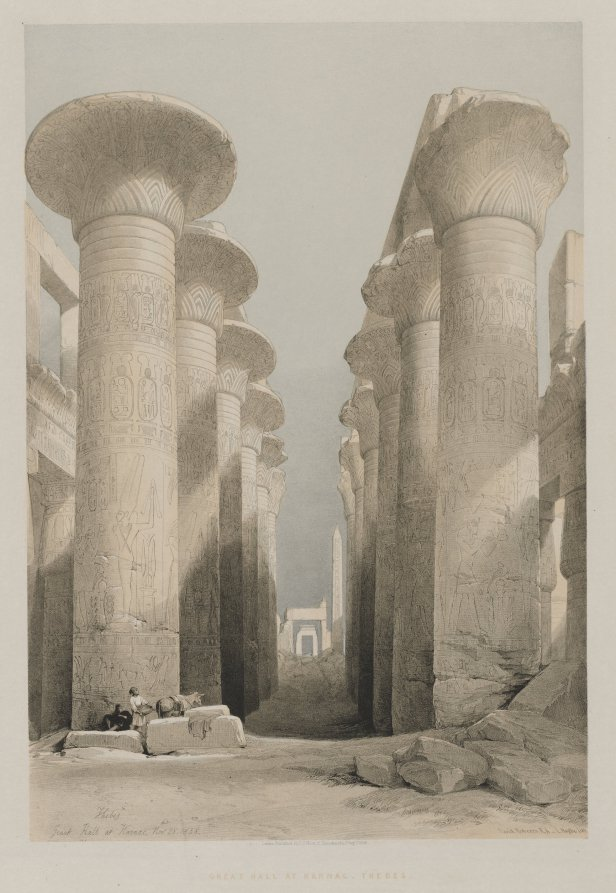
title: Egypt and Nubia, Volume I: Thebes, Great Hall at Karnac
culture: England, 19th century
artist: Louis Haghe (British, 1806–1885)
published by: F. G. Moon, 20 Threadneedle Street, London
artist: after David Roberts (Scottish, 1796–1864)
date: 1848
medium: color lithograph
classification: Print